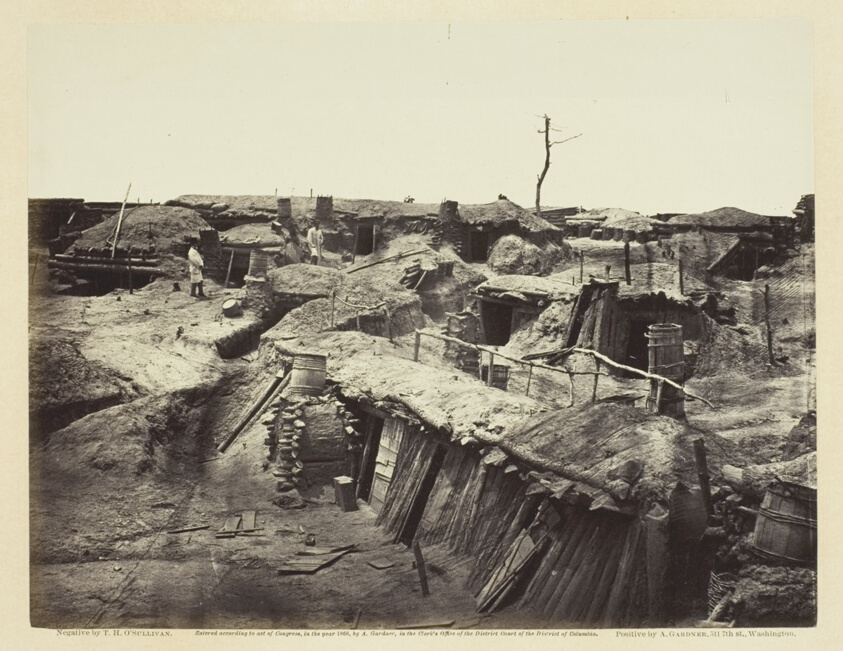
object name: Photograph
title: Quarters of Men in Fort Sedgwick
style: 19th century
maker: Timothy O'Sullivan (American, born Ireland, 1840–1882)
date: May 1865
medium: Albumen print, pl. 83 from the album "Gardner's Photographic Sketch Book of the War, Volume II" (1866)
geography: United States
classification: photograph; albumen silver print; photography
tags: Collected by Hugh Edwards, Gardner's Photographic Sketch Book